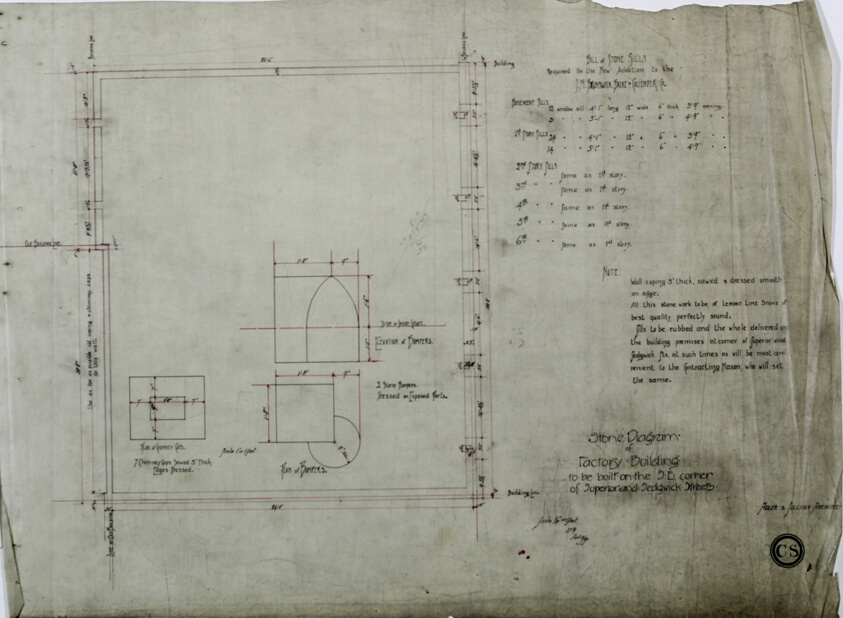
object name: Architectural Drawing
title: Brunswick Balke Collender Company Factory Building, Chicago, Illinois, Stone Specifications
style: 19th century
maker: Adler & Sullivan, Architects; American, 1883-1895; Delineator: Curth, William F.; American, 19th cen.; Delineator: Gill, Irving J.; American, 1870-1936; Delineator: Self, Charles J.; American, 19th Cen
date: 1891 Destroyed by fire on April 15, 1989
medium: Black and red ink on linen with pencil notes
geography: United States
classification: architectural drawing; architecture; architectural working drawing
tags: Chicago, office buildings, buildings, architecture, urban planning, illinois